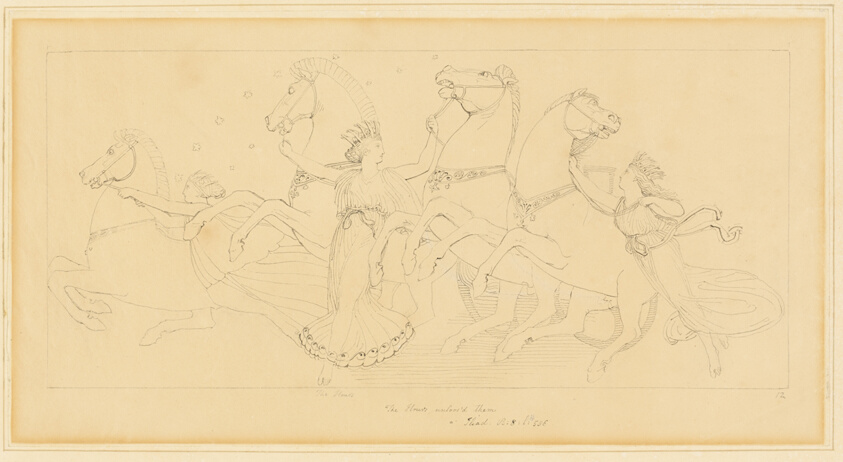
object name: Drawing and Watercolor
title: The Hours Taking the Horses from Juno's Car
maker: John Flaxman, II; English, 1755-1826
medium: Pen and black ink, over graphite, on tan wove paper, laid down on cream wove paper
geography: England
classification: pen and ink drawings; drawings (visual works); prints and drawing